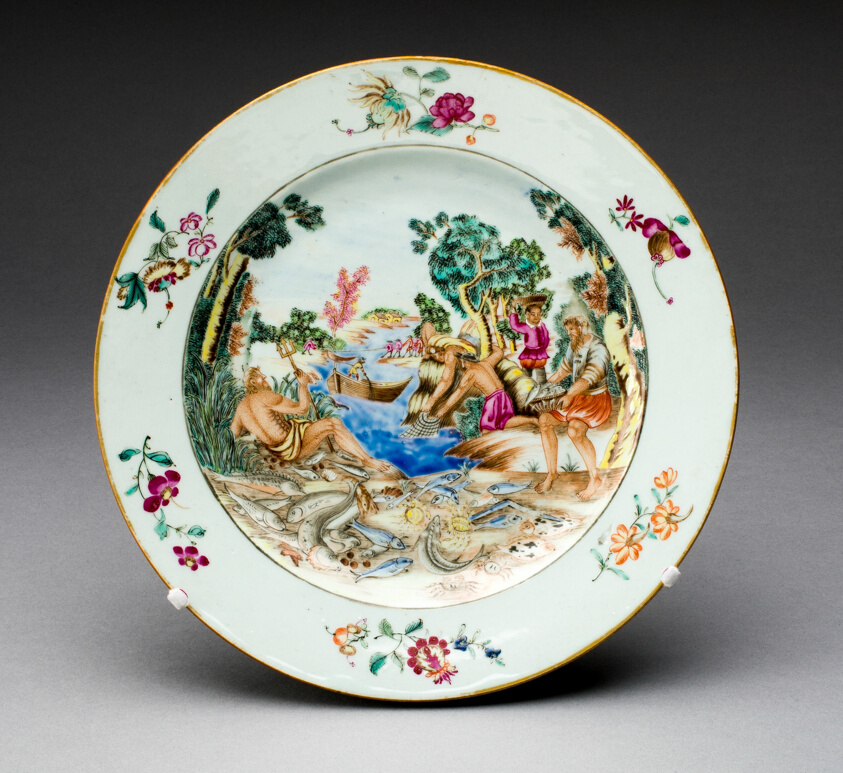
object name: Ceramics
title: Plate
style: chinese export, Chinese (culture or style), East Asian, asian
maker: China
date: c. 1750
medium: Hard-paste porcelain with polychrome enamels and gilding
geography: Jingdezhen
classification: plate (general, dish); dish (vessel); chinese export porcelain; porcelain; european decorative arts; ceramics